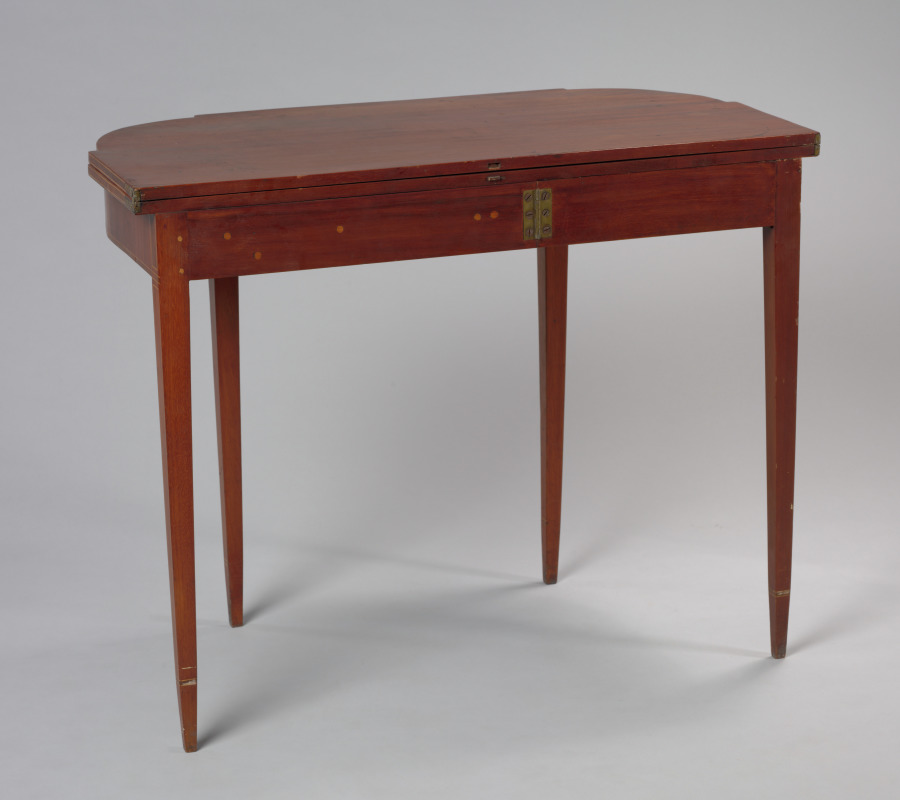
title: Table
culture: America, Sheraton Type, early 19th century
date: early 1800s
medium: mahogany with inlays of various woods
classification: Furniture and woodwork